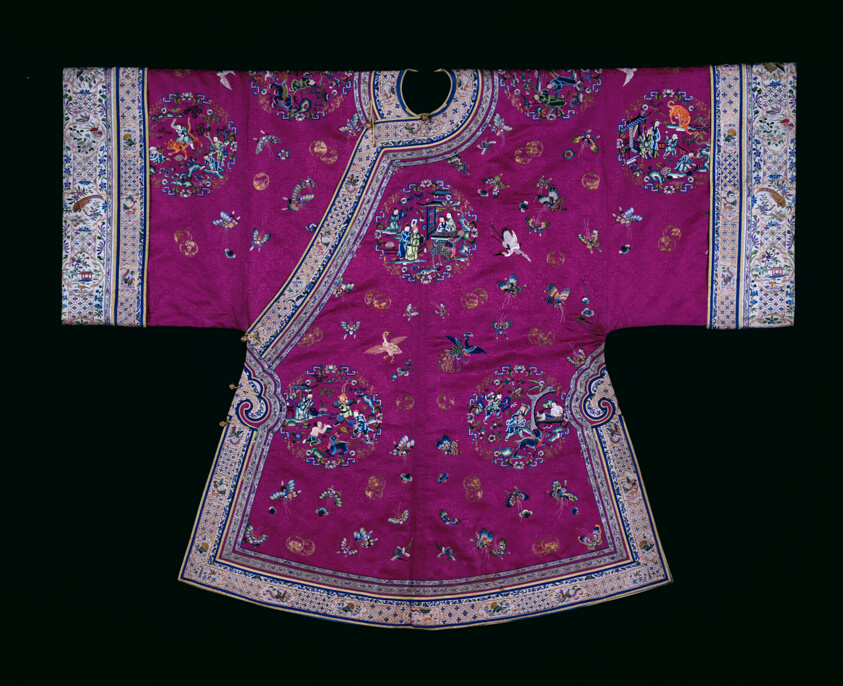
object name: Costume and Accessories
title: Woman's Ao (Short Robe)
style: qing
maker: Han-Chinese (China)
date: Qing dynasty (1644–1911), 1870/90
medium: Silk, 7:1 satin damask weave; embroidered with silk and gold-leaf-over-lacquered-paper-strip-wrapped silk in knot, satin, and stem stitches; laid work and couching; sleeve bands: silk, warp-float faced 7:1 satin weave; embroidered with silk, gold-leaf-over-lacquered-paper-strip-wrapped wild silk, and gilt-metal-strip-wrapped silk in eyelet, feather, knot, satin, single satin, and stem stitches; laid work and couching; ribbons: silk and gold-leaf-over-lacquered-paper-strip-wrapped silk, complementary warp 7:1 satin weave with plain interlacings of secondary binding warps and self-patterning ground wefts; trim and closures: silk, warp-float faced 7:1 and 4:1 satin weaves; lined with silk, plain weave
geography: China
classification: textile; costume; needlework (visual works); weaving